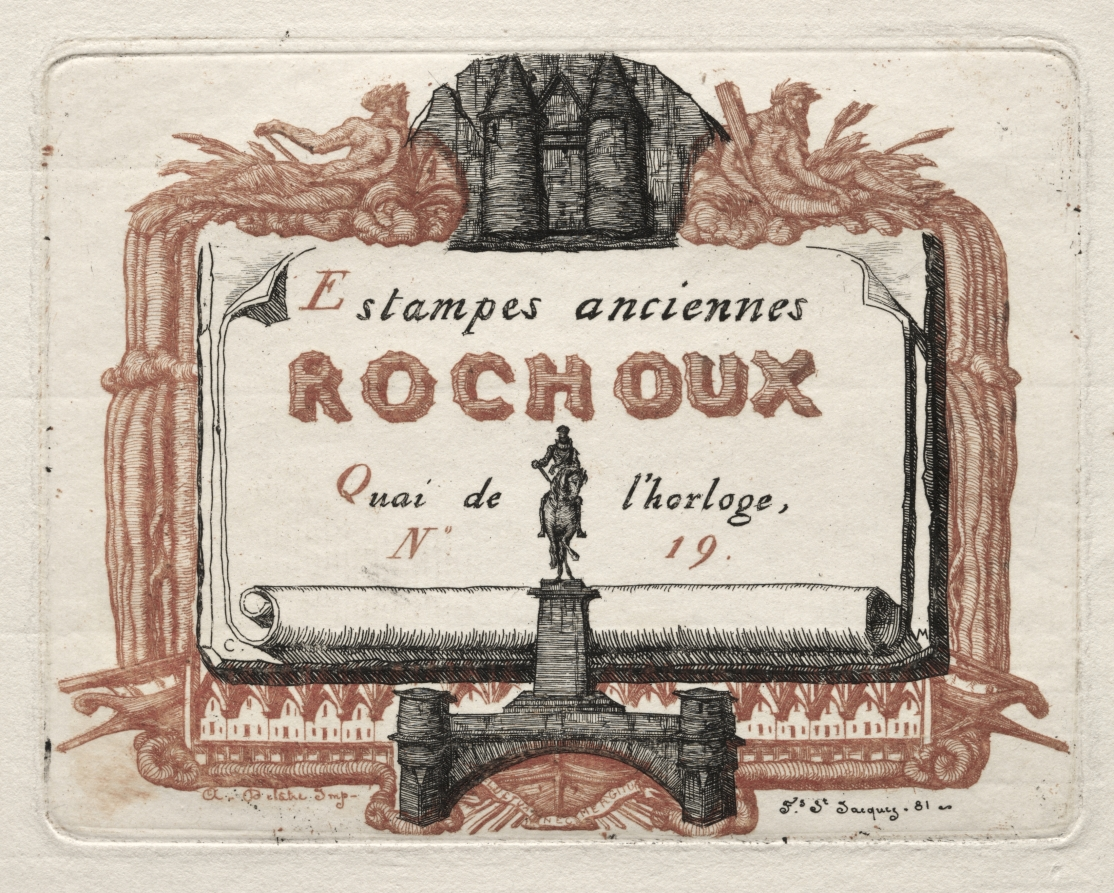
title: The Address Card of Rochoux, a Printseller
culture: France, 19th century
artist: Charles Meryon (French, 1821–1868)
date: c. 1856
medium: etching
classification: Print